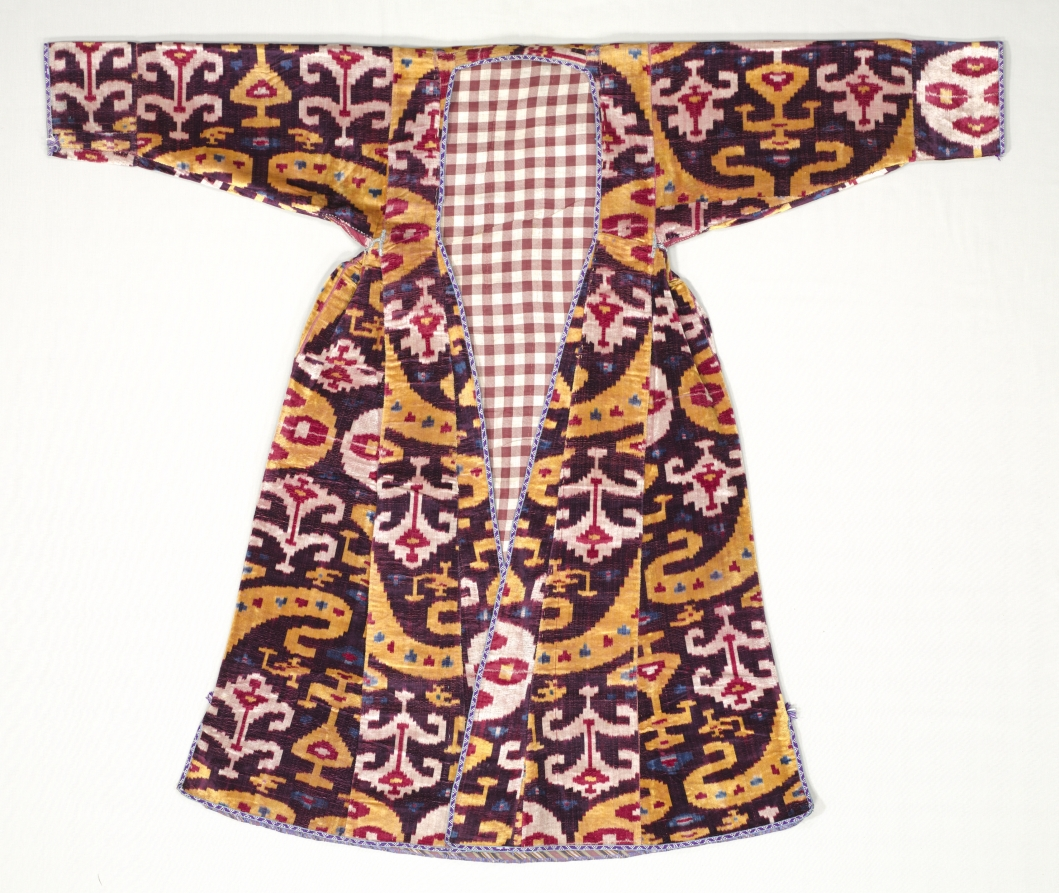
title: Woman’s Robe (munisak)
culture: Uzbekistan, Bukhara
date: 1850–75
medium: Silk: velvet ikat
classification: Garment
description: Dazzling ikat velvet robes, the most sumptuous, expensive, and prestigious type of ikat, were worn throughout Central Asia by men and women. This resplendent robe with a V-shaped neckline, fitted torso, and slightly flaring skirt features stylized blossoming plants, pomegranates, and auspicious curved ram’s horns, all with irregular contours of the resist-dye ikat technique. Such female robes were culturally significant in Central Asia. Made for wedding dowries with fabric from the groom’s family, women wore munisaks for rites of passage throughout their lives, as a bride, at family festivals, and funerals.